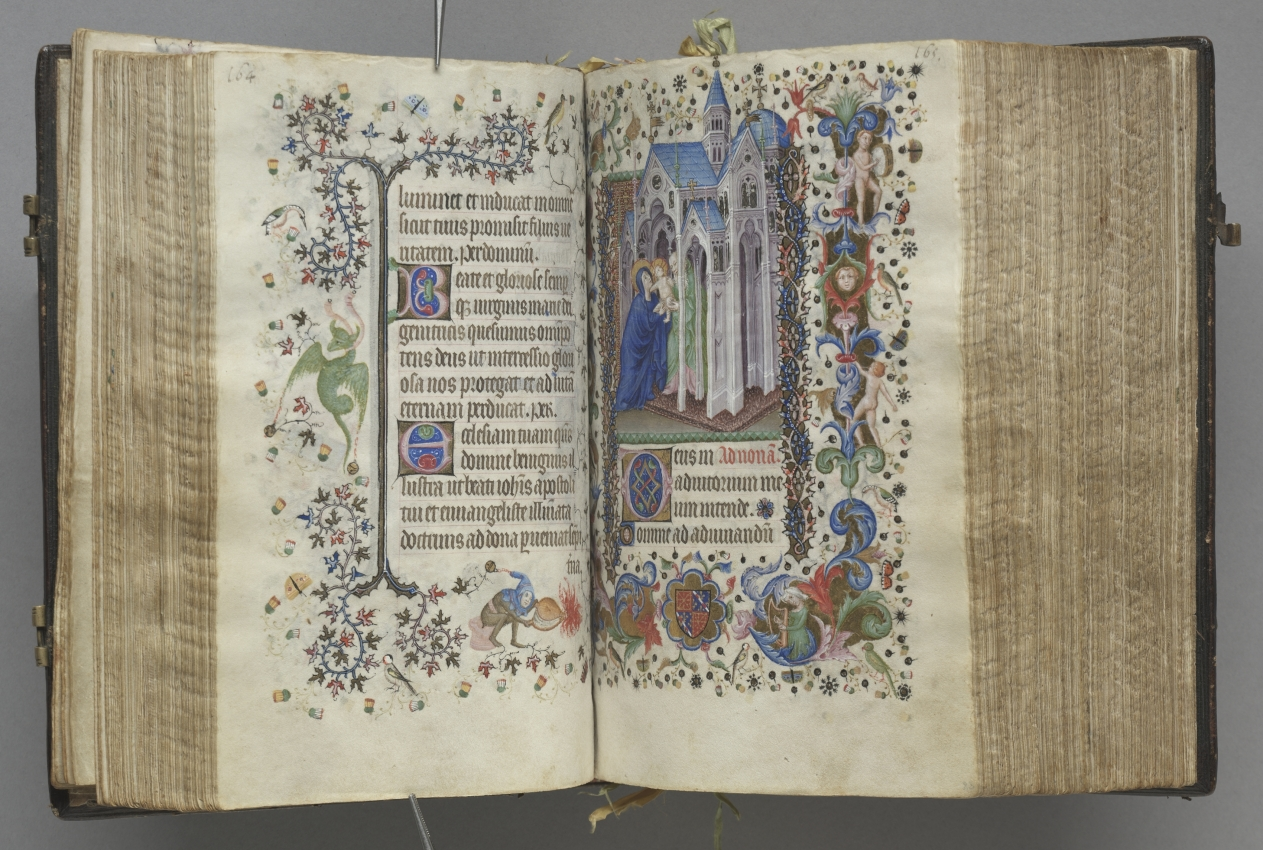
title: Hours of Charles the Noble, King of Navarre (1361-1425): fol. 82v, Text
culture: France, Paris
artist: Master of the Brussels Initials and Associates (French)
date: c. 1405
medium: ink, tempera, and gold on vellum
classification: Bound Volume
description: This precious volume was obviously highly prized by its owner, the French-born King of Navarre, who had his coat of arms painted on no less than twenty folios. Rather than directly commissioning this manuscript from a specific workshop, it seems that Charles the Noble acquired his book of hours -- perhaps ready-made for the luxury market -- while on a trip to Paris in 1404-05. A collaborative effort, six painting styles are evidenced within the pages of this codex, those of two Italians, two Frenchmen, and two Netherlanders. The painter who was responsible for the planning and decoration of the book, and who produced seventeen of the large miniatures, was a Bolognese artist known as the Master of the Brussels Initials. His principal assistant, responsible for most of the borders, was a Florentine who signed his name "Zecho" da Firenze on folio 208 verso.